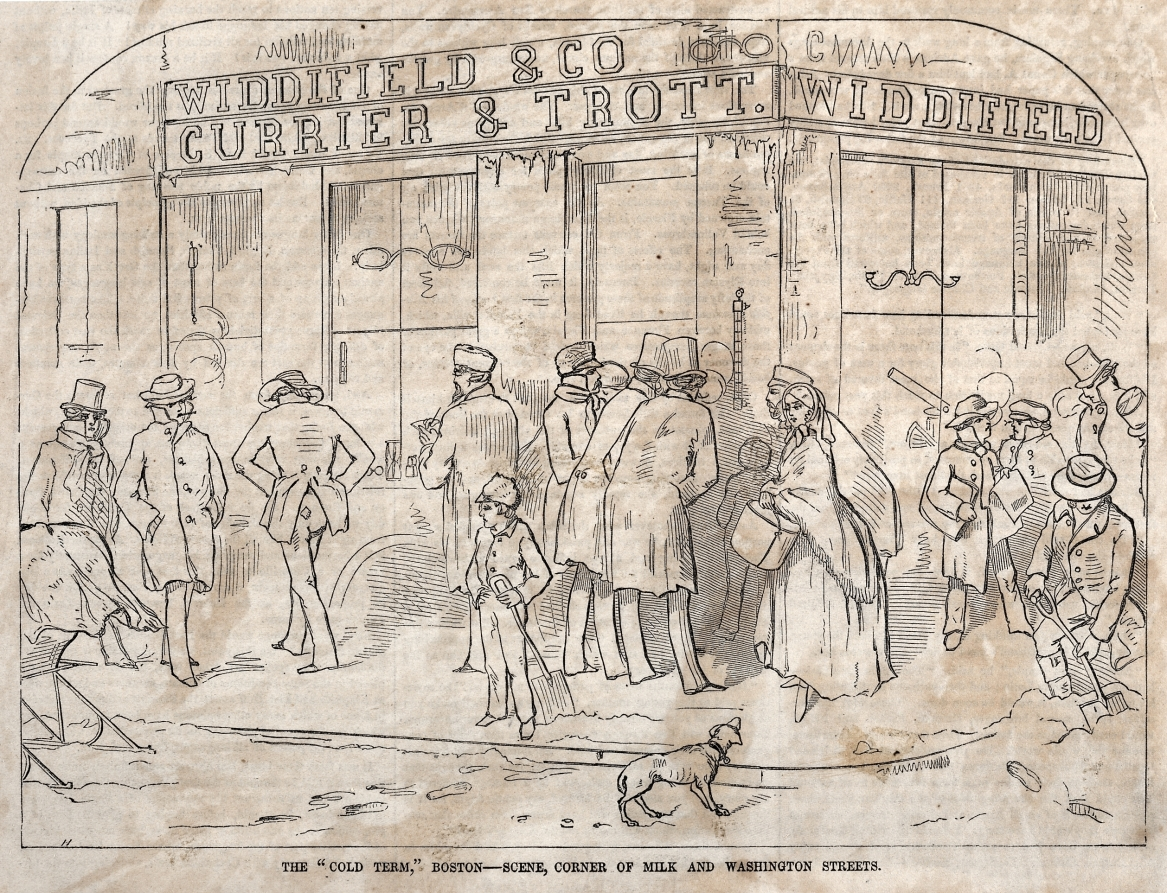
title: The "Cold Term," Boston - Scene, Corner Milk and Washington Streets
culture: America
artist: Winslow Homer (American, 1836–1910)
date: 1858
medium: wood engraving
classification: Print